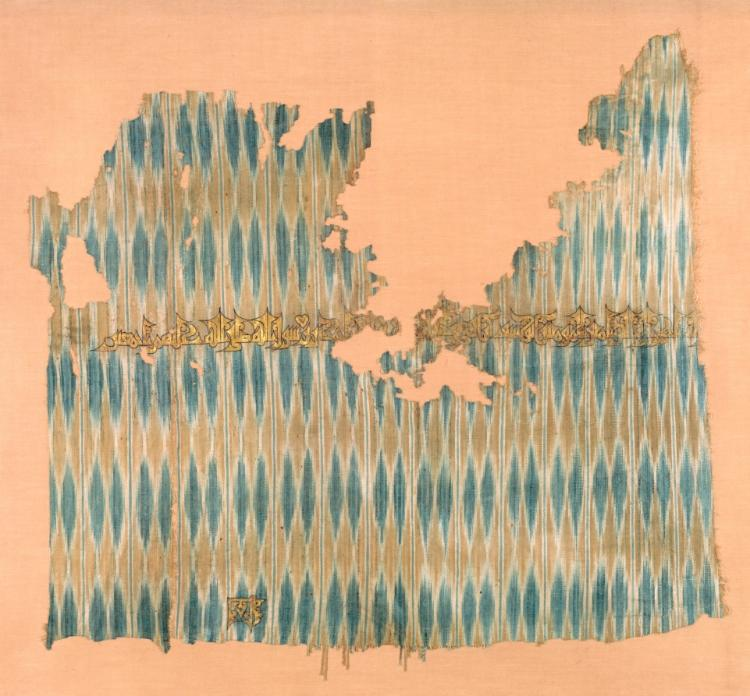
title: Ikat tiraz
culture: Yemen, San'a', Zaydi Imam period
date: 960–80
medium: resist-dyed warp (ikat); plain weave with inscription: cotton and gold leaf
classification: Textile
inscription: Kufic inscription, translated as: ". . . [a]l-Dá'i ilá al-Haqq, Commander of the Believers, Yusuf b. Yahya b. al-Nasir li-Din Allah Ahmad, son of the apostle of God, may God bless them all." At the bottom, the word "to God" is inverted. "Yusuf ibn Yahya" ruled AD 968-998)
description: The "flame" pattern was dyed on the vertical warp threads before weaving began by tightly binding them to resist dye penetration, and repeated for each color. The process and fabric are called ikat, a Malaysian word which may have originated in South Arabia. Yemeni ikats with historical Arabic inscriptions from the 10th century are among the oldest known. This text, written in Kufic script with gold leaf outlined in black, identifies a ruler of the Yemen: ". . . [a]l-Da’i ila al-Haqq, Commander of the Believers, Yusuf b. Yahya b. al-Nasir li-Din Allah Ahmad, son of the apostle of God, may God bless the all." The Arabic phrase "to God" is inverted at the bottom.